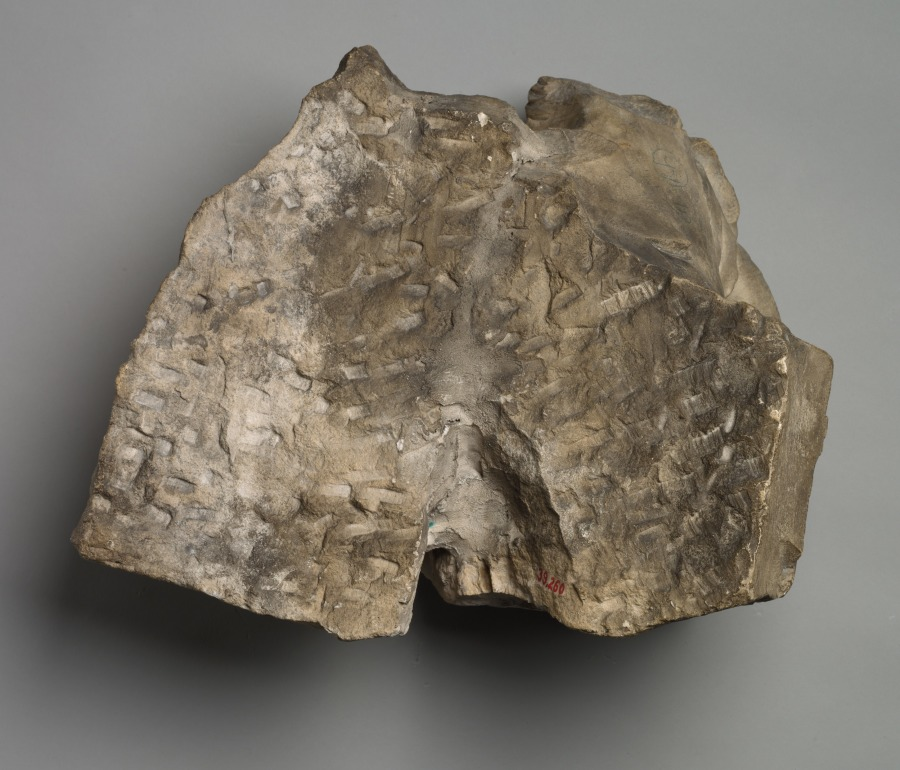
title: Fragment of a Female Figure with Child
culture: France, School of Troyes, 16th century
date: early 1500s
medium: stone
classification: Sculpture